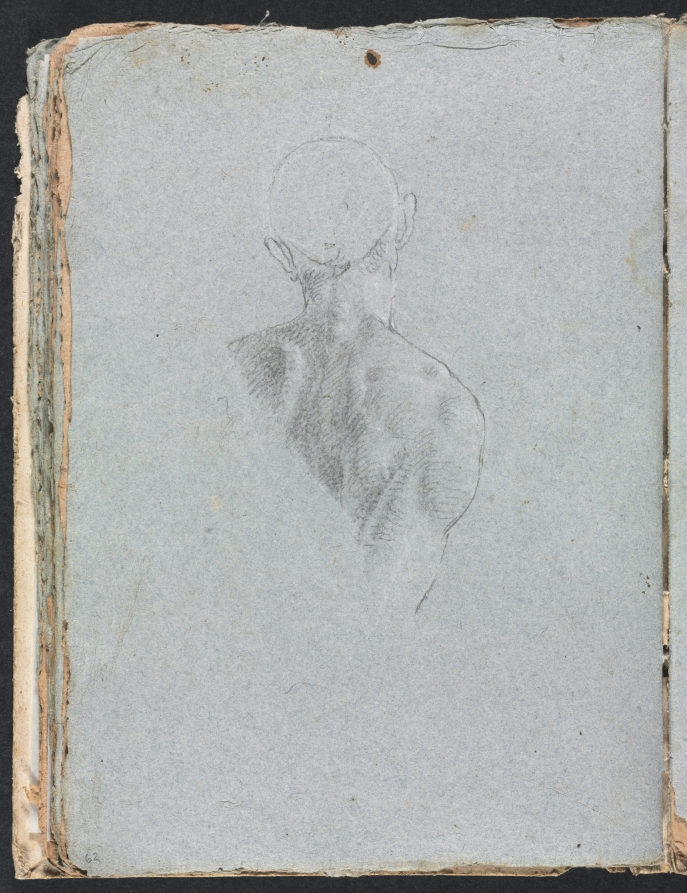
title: Verona Sketchbook: Male nude head and shoulders from behind (page 62)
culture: Italy, 18th century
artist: Francesco Lorenzi (Italian, 1723–1787)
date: 1760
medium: black chalk with white heightening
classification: Bound Volume